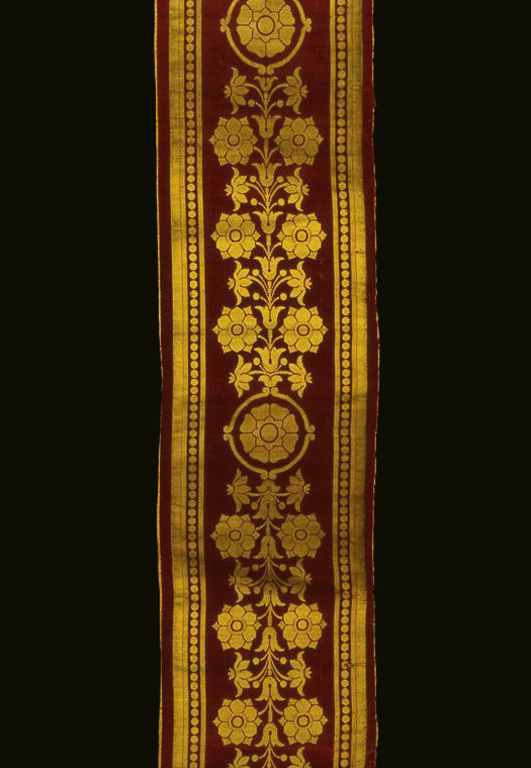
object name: Textile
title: Border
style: empire, european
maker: France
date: Empire period, 1804/14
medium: Silk, warp-float faced 4:1 satin weave with 3:1 twill interlacings of secondary binding warps and supplementary patterning wefts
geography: France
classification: textile; weaving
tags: flowers